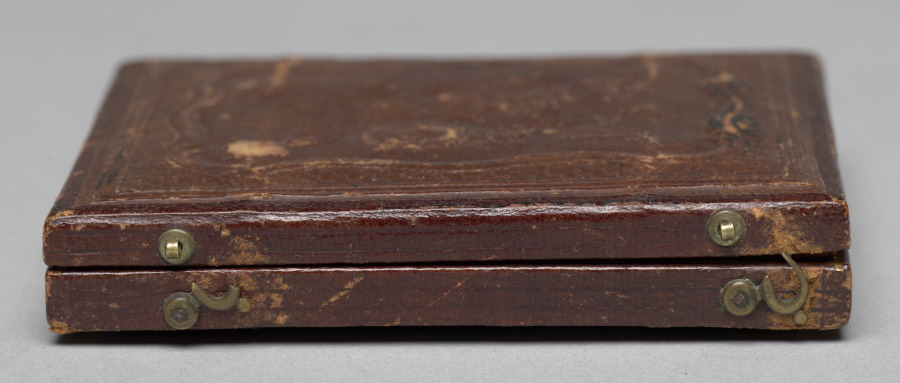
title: Standing boy with bottle curls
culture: America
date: c. 1853–54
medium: daguerreotype, sixth plate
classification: Photograph